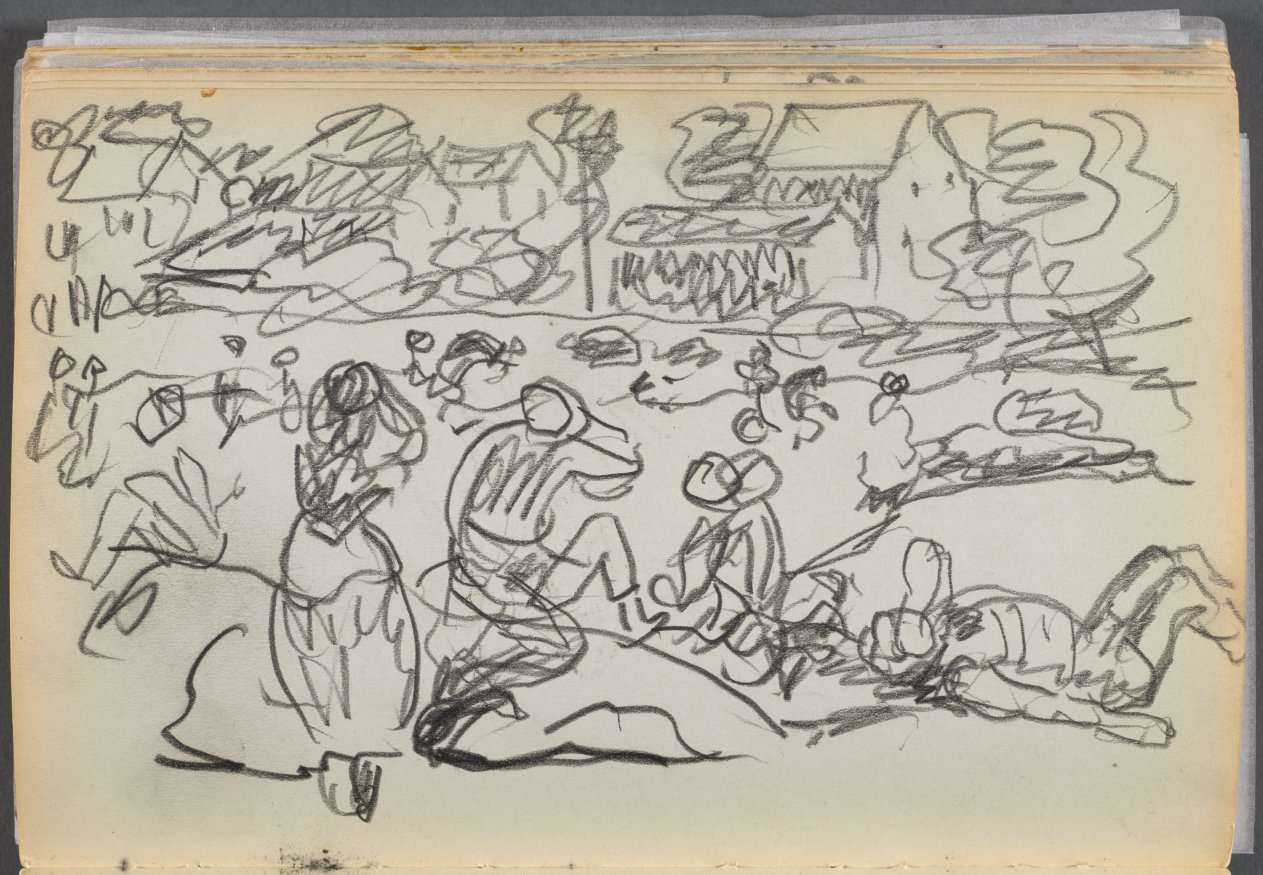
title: Sketchbook- The Granite Shore Hotel, Rockport, page 166: Figures on a Beach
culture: America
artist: Maurice Prendergast (American, born Newfoundland [now Canada], 1858–1924)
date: 1905–10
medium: graphite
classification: Bound Volume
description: This sketchbook contains 72 pages of pencil drawings and 9 watercolors of Cape Ann. On the inside of the cover Prendergast wrote the address of the Granite Shore Hotel in Rockport, Massachusetts.